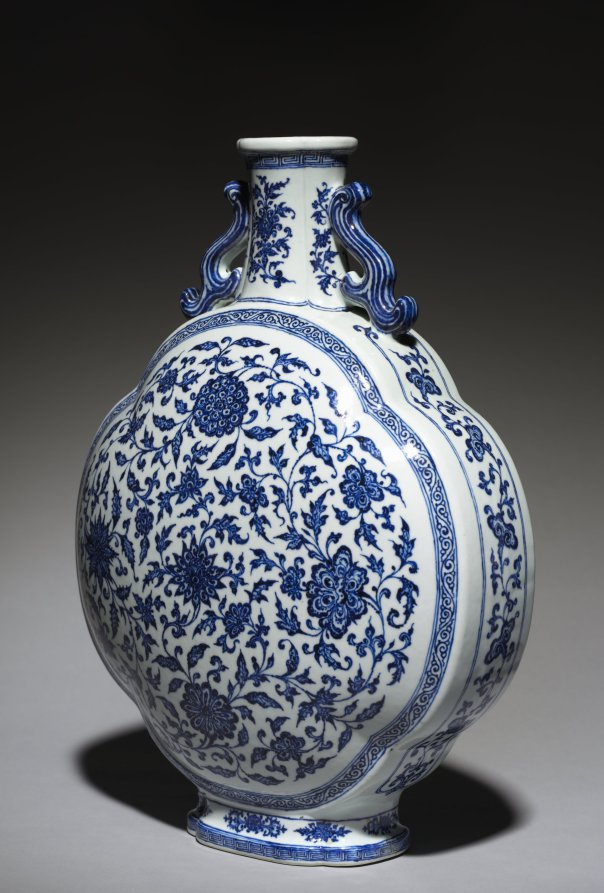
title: Gourd Flask with Floral Scrolls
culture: China, Jiangxi Province, Jingdezhen, Qing dynasty (1644–1911), Yongzheng mark and period (1723–35)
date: 1723–35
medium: porcelain with underglaze blue decoration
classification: Ceramic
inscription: Yongzheng mark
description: This large blue-and-white pilgrim–shaped vase was fashioned from fine kaolinic porcelain at the imperial kilns at Jingdezhen, Jiangxi province. The body of the vase is of quatrefoil shape merging into a highly similar shaped neck, flanked by two scroll handles. The base is of oval quatrefoil form. The vase is decorated with lotus and other flowers, leaves, and scrolling tendrils in brilliant underglaze cobalt blue beneath a pellucid glaze. The underfoot bears an imperial mark.